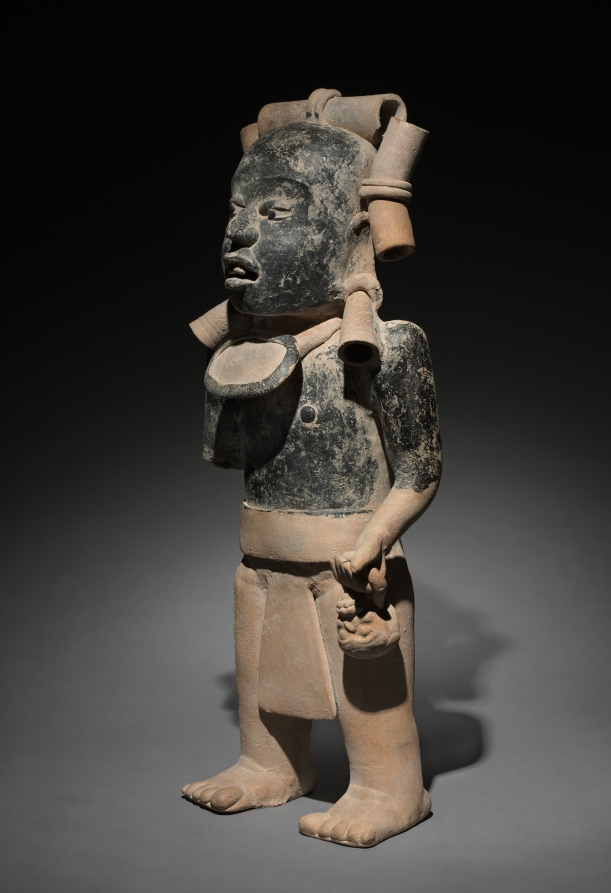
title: Standing Male Figure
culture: Mexico, Gulf Coast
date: 300–900 CE (thermoluminescence date, 240–945 CE)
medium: earthenware, asphalt and resin paint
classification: Sculpture